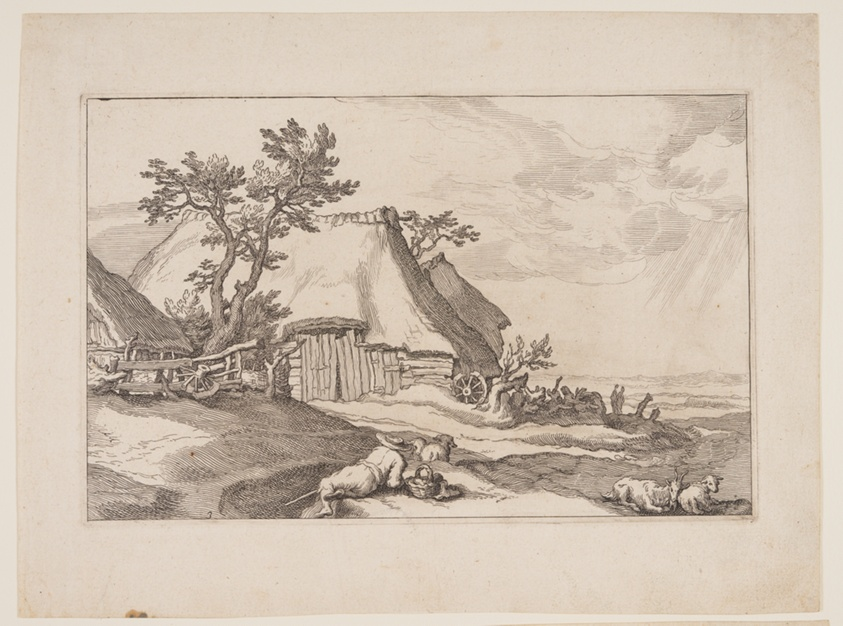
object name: Print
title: Plate 3, from Landscapes with Farmhouses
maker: Boëtius Adamsz. Bolswert (Flemish, 1580–1633); after Abraham Bloemaert (Dutch, 1566–1651)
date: 1614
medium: Etching on ivory laid paper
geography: Flanders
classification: print; paper; prints and drawing; etching